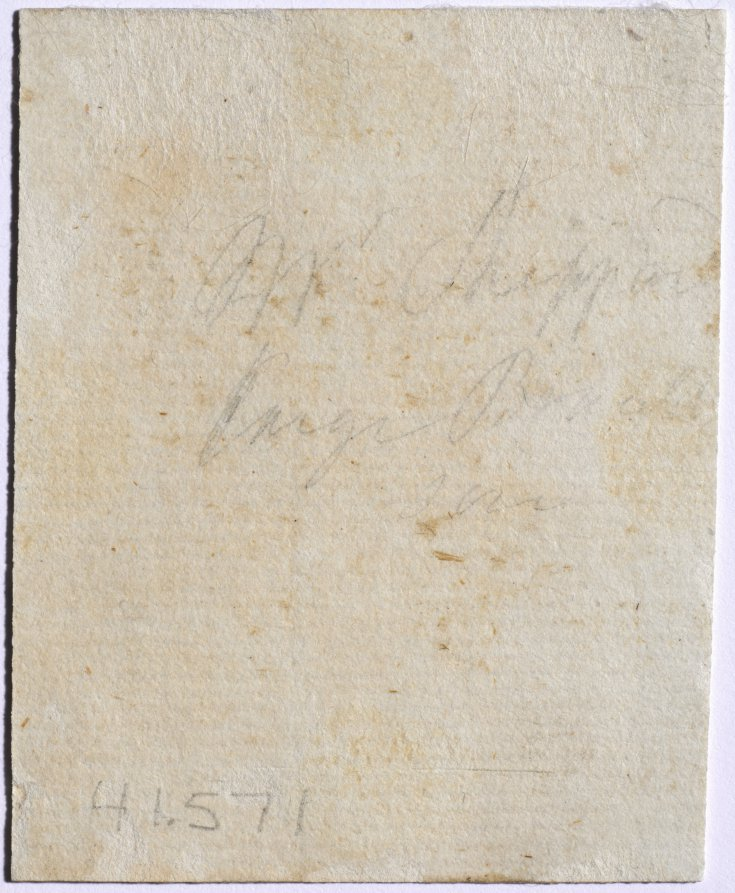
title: Portrait of Mr. Shippard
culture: England, 18th century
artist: John I Smart (British, 1741–1811)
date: c. 1776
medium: graphite and wash on laid paper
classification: Portrait Miniature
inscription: inscribed very faintly in graphite on front at upper right: 161; on back (paper backing to which drawing paper was adhered) inscribed in graphite, at top upside down: 161; also on paper backing in graphite, on a slant at lower left: Mr. Jones; inscribed on back of drawing, beneath paper backing, in graphite: Mr Shippar[d] large Bracelet size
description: Although it is impossible to say whether or not it was always part of the artist’s process to execute a preparatory sketch prior to painting each miniature, we do know that John Smart retained many hundreds of these sketches. A group of preparatory sketches—of which this portrait is one—descended through the Smirke family after Smart’s daughter Sarah gave a sketchbook containing preparatory portrait studies to her friend Mary Smirke, sister of the celebrated Victorian architect Sydney Smirke. This book was probably broken up around 1877 when its contents was divided between Sydney’s daughters Mary Jemmett and Mrs. Lange, whose portions were both sold at auction in 1928. G. C. Williamson was the first to suggest that Smart’s sketches were well known and that they were preparatory studies for the painted miniatures. Williamson listed the names of sitters from the sketches known to him at the time, and they include a Mr. Jones, the title formerly given to the sketch here. This designation was applied only to a paper backing that had been attached after the drawing had been removed from the sketchbook. There is no further evidence for this attribution, however. The sketch is of the sitter’s head only, with a slight suggestion of a high stock collar. His head faces to the left, and his light hair is combed straight back with a flat curl above his right ear. He is depicted in an oval, and the background is unpainted. The number 161 is inscribed in graphite on both the front of the drawing and its paper backing. Upon removal of the paper backing in 1993, an inscription in graphite was revealed. Perhaps written in the artist’s hand, it suggests that the sitter’s name may be Mr. Shippar[d]. There are no known portraits of this gentleman. The work can be dated to about 1776 because of its size, which, when painted on ivory, would have been around 2 inches in height. An inscription on the back of the drawing suggests that the miniature was to be mounted on a bracelet. To this date, the finished ivory for which this preparatory sketch was presumably undertaken has not been discovered.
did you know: Sketches helped John Smart work out the particulars of a portrait before commencing the miniature on ivory, and they were useful in the event that a duplicate might later be required.